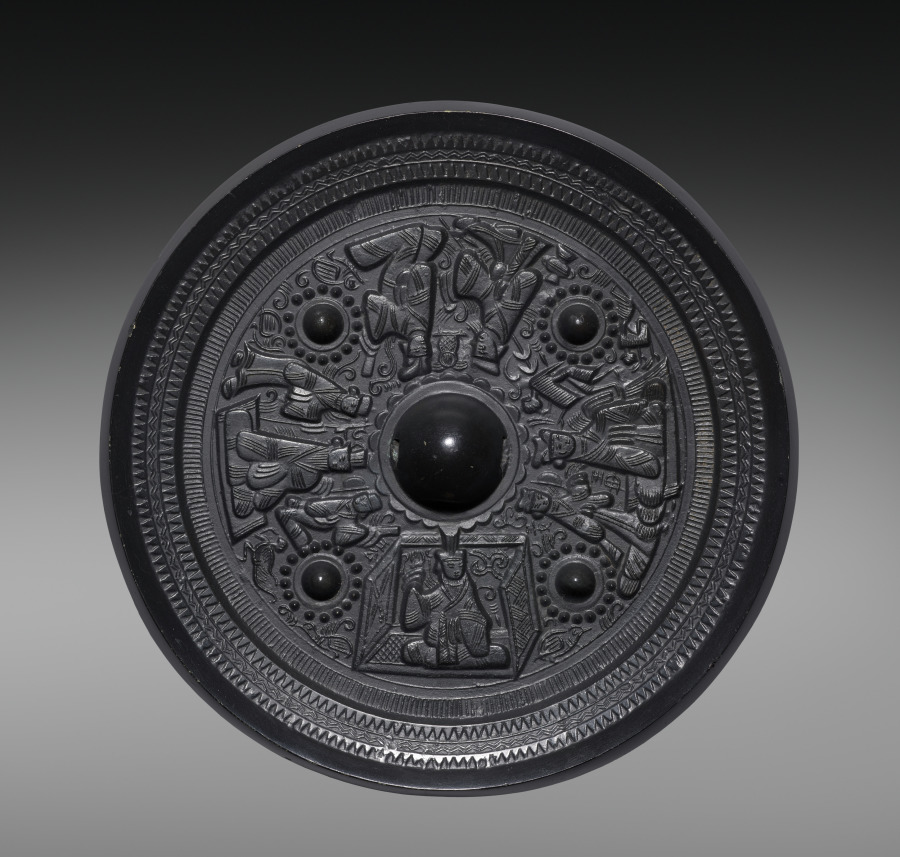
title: Mirror with Deities and Kings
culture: China, Eastern Han dynasty (25–220 CE)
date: 100s CE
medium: bronze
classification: Metalwork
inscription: Queen Mother; King Father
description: Decorated with historic figures from the former states of Wu and Yue, this mirror illustrates the rivalry between the states of Wu (around the Lake Tai basin) and Yue (around Hangzhou Bay) that eventually resulted in the defeat of Wu in 473 BCE. Its downfall became a story retold during the Han dynasty on mirrors from the Shaoxing era. During the relatively peaceful Han dynasty, the number of bronze mirrors used in burials and as gifts increased, as less metal was used for weaponry. Previously known for sword making and having rich metal resources, places like Shaoxing in Zhejiang province became centers of mirror production.